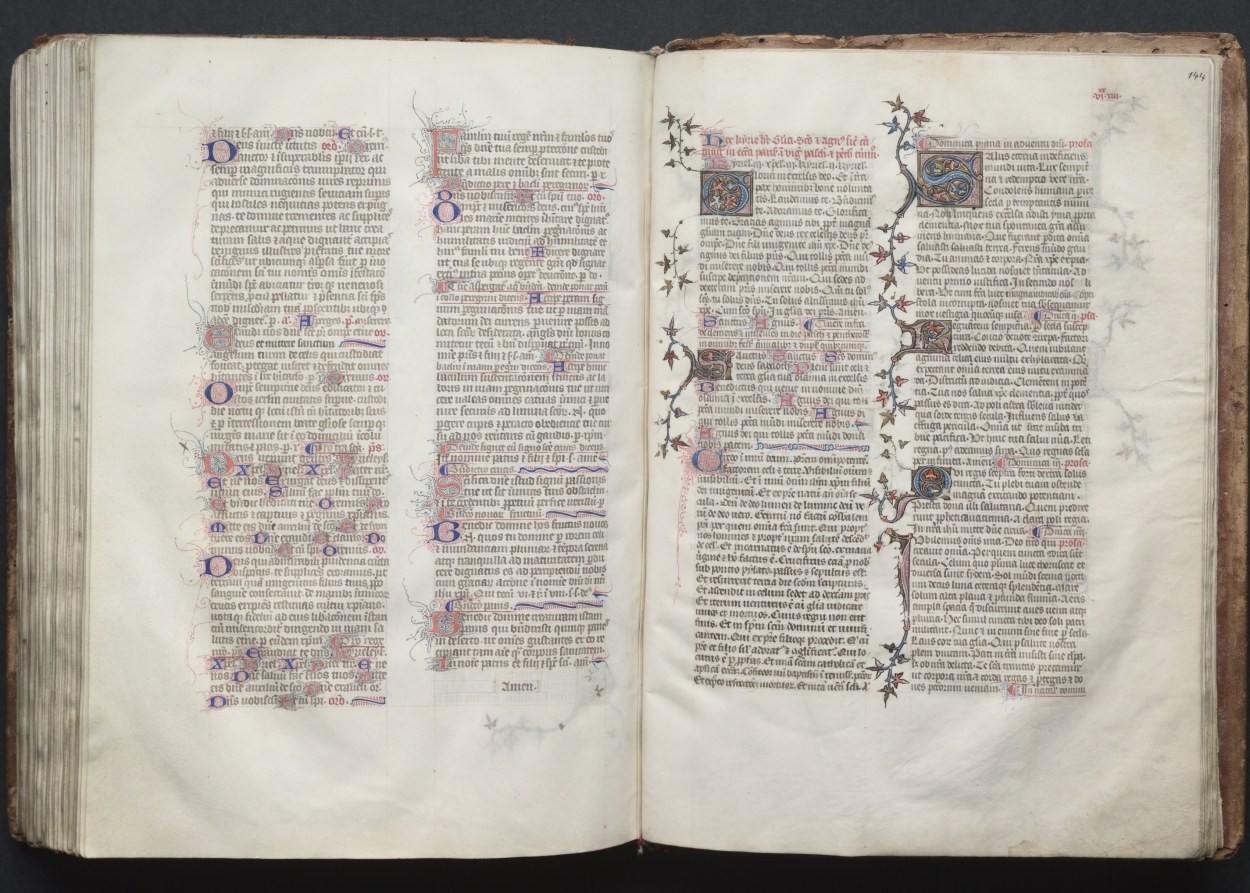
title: The Gotha Missal: Fol. 143v Text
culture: France, Paris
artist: Master of the Boqueteaux (French)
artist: and Workshop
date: c. 1375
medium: ink, tempera, and gold on vellum; blind-tooled leather binding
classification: Bound Volume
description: The style and quality of this manuscript's decoration is typical of deluxe Parisian books made for aristocratic or royal patrons. Most of the book's decoration appears to be the work of the Master of the Boqueteaux, an artist active at the court of King Charles V (died 1380). His style was apparently shared by a number of book illuminators working in and around Paris. It is very possible that the Gotha Missal belonged to Charles V, but is not provable because the manuscript has no royal portraits and lacks a colophon. Given the book's magnificent decoration, however, it would seem that it was produced for a Valois prince, if not for the king himself. The manuscript receives its name from the German dukes of Gotha, its later owners.